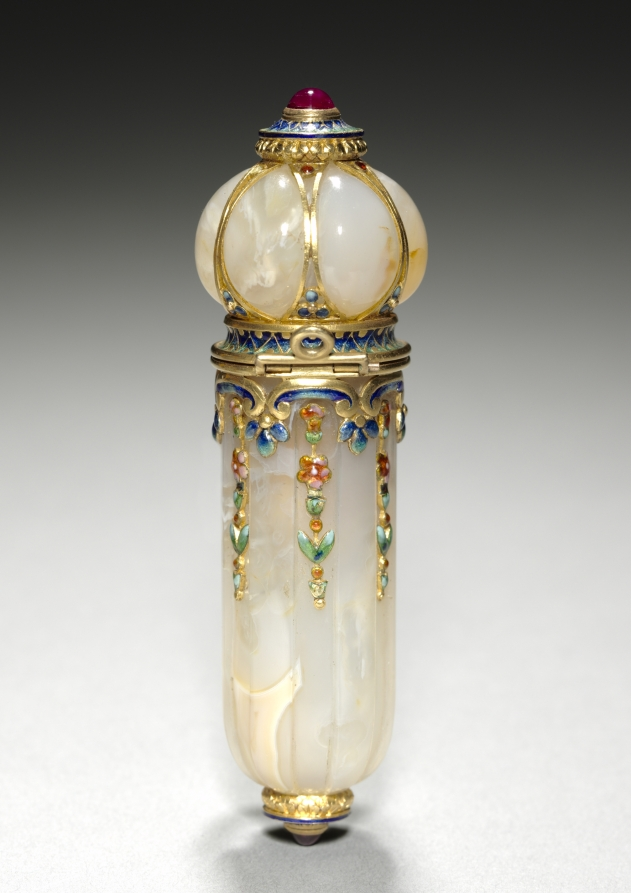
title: Perfume Vial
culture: France, Paris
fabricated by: Tecla Firm (French)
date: c. 1900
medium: agate with enamel, gold, rubies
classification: Miscellaneous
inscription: "Tiffany & Co." engraved at edge of top.